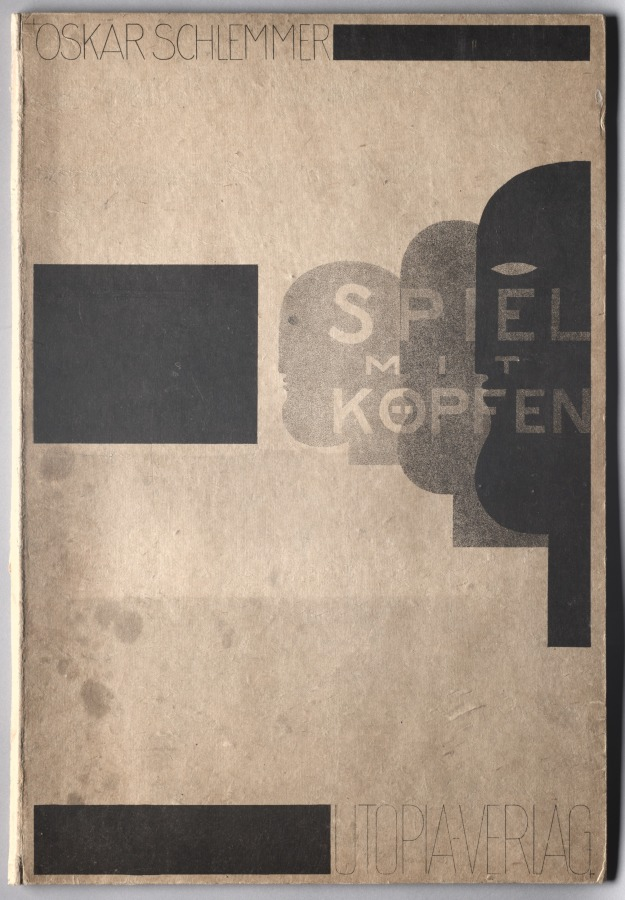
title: Play with Heads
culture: Germany, 20th century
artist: Oskar Schlemmer (German, 1888–1943)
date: 1923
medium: lithograph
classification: Portfolio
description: Variations on a theme, this rare set of prints explores diverse arrangements of three heads. Each image uses a single color and was printed in a spatter technique first used in the 19th century by French lithographers like Henri Toulouse-Lautrec. By drawing a blade across a toothbrush saturated with lithographic ink, the ink is spattered onto the lithographic stone in a random pattern of variously sized dots. By controlling the fine spray of droplets, transparent forms and a wide tonal range can be obtained. Unlike his contemporaries, El Lissitzky, Lázló Moholy-Nagy, and Kurt Schwitters, whose work focused only on abstraction, Schlemmer was intensely interested in the human form. He once said, however, that he was "interested in creating human types, not portraits." Thus he did not portray specific individuals, but prototypes for a purified, timeless image of humanity.